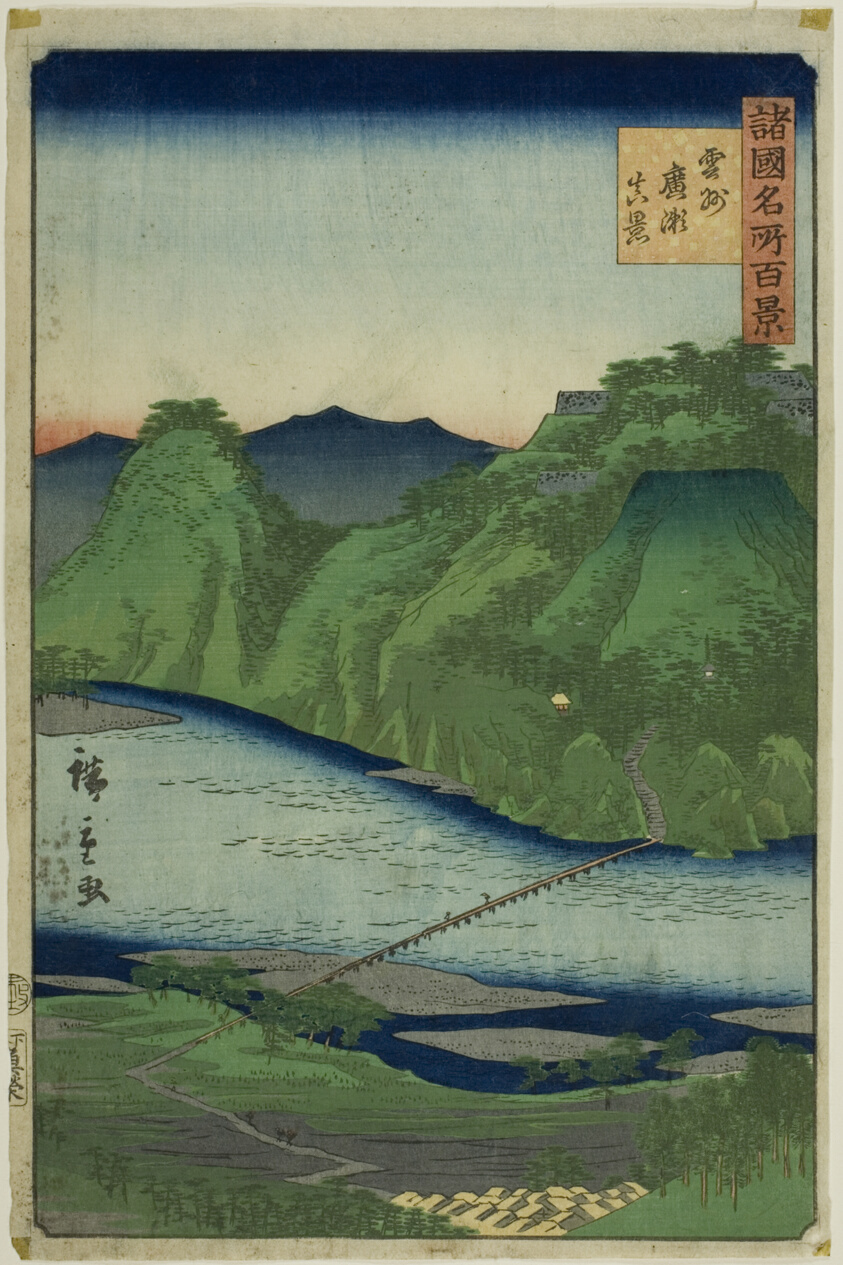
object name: Print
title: Actual View of Hirose, Unshu Province (Unshu hirose shinkei) from the series “One Hundred Famous Views in the Various Provinces (Shokoku meisho hyakkei)”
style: Japanese (culture or style)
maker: Utagawa Hiroshige II (Shigenobu) (Japanese, 1826–1869)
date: 1859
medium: Color woodblock print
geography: Japan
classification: woodblock print; print